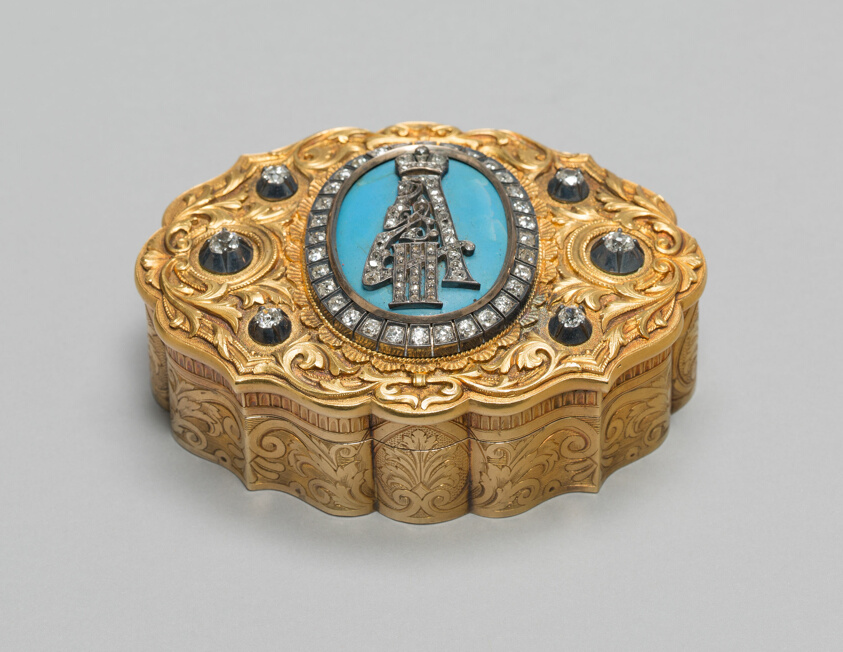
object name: Metalwork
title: Snuff Box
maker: Russia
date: 1881/94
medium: Gold, paste stones and metal setting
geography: Russia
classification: snuff box; european decorative arts; metalwork